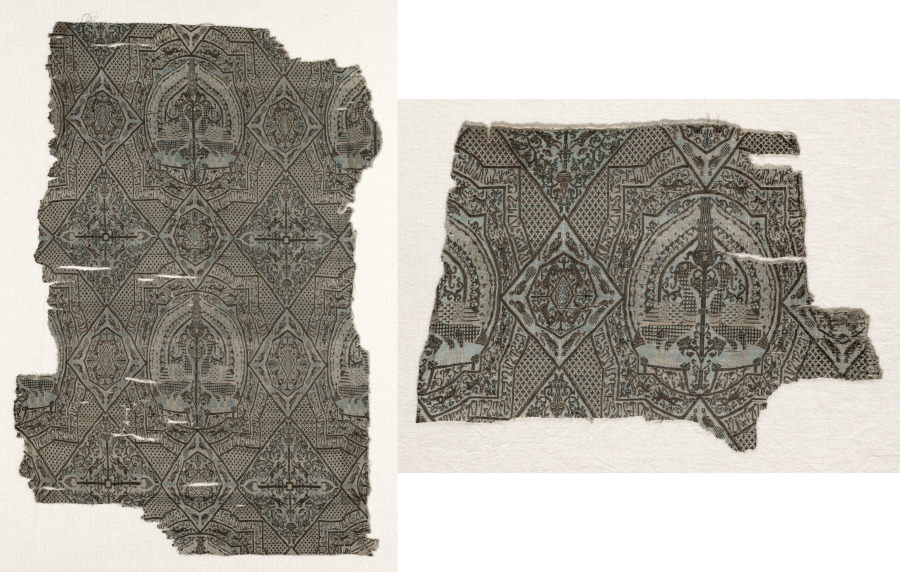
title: Fragments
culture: Iran or Iraq, in the style of the Seljuq period (1037–1194)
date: before 1968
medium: Silk: lampas weave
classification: Textile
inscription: fa-idha al-na'imu wa-kullu ma yulha bihi/ yawm (an in superscript) yasiru ilá bilá wa-nafadi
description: Geometric medallions aligned on a diaper ground are enclosed in a grid of large and small lozenges. Medallions contain confronting peacocks flanking a Tree of Life. The double border has an inner frieze of running animals and an outer band of Kufic inscription. The larger diamonds contain four-directional palmette trees and two opposed pairs of rampant animals. The smaller diamonds have pairs of peacocks in each corner framing an octagon, which contains two opposed pairs of animals flanking a central lozenge. Floral vines and ornaments fill the interspaces of large and small diamonds.